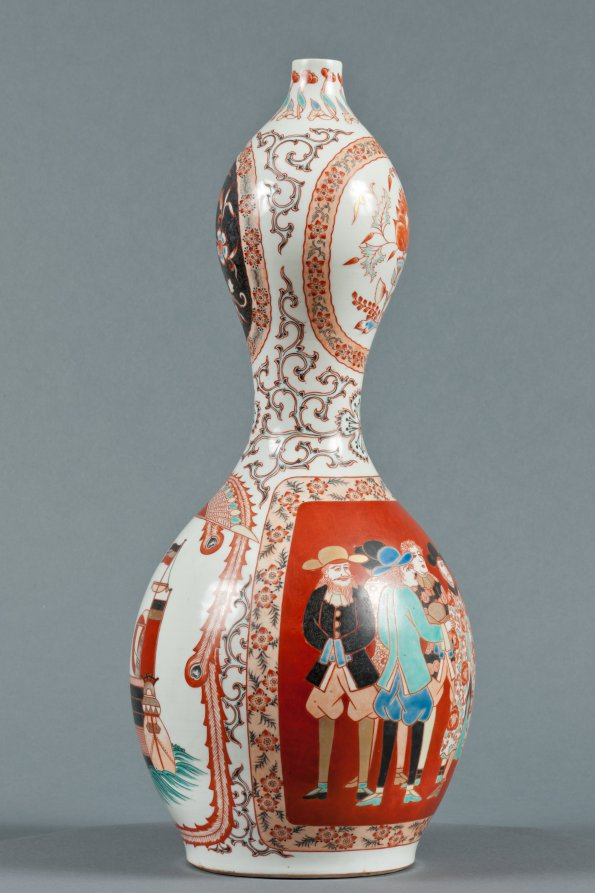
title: Bottle with Western Ships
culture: Japan, Edo period (1615–1868)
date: c. 1800–1868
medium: Porcelain with decoration in colored enamels and underglaze blue, overglaze enamels, and gold (Hizen ware, Arita type)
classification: Ceramic